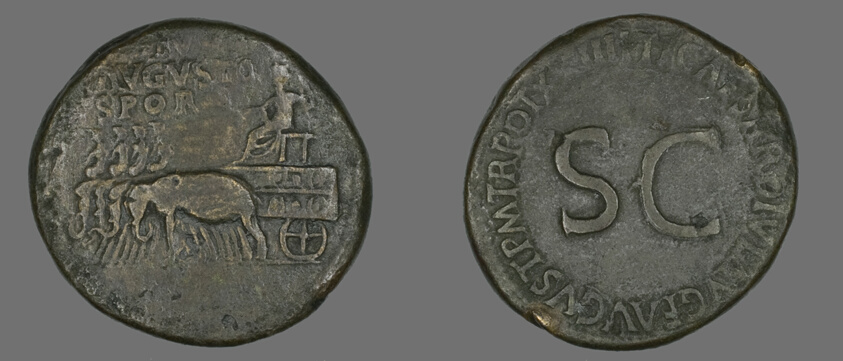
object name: Coin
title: Sestertius (Coin) Portraying Emperor Augustus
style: roman (ancient, style or period)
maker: Roman, minted in Rome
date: 34-35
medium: Bronze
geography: Roman Empire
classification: coin; ancient art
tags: Chariots